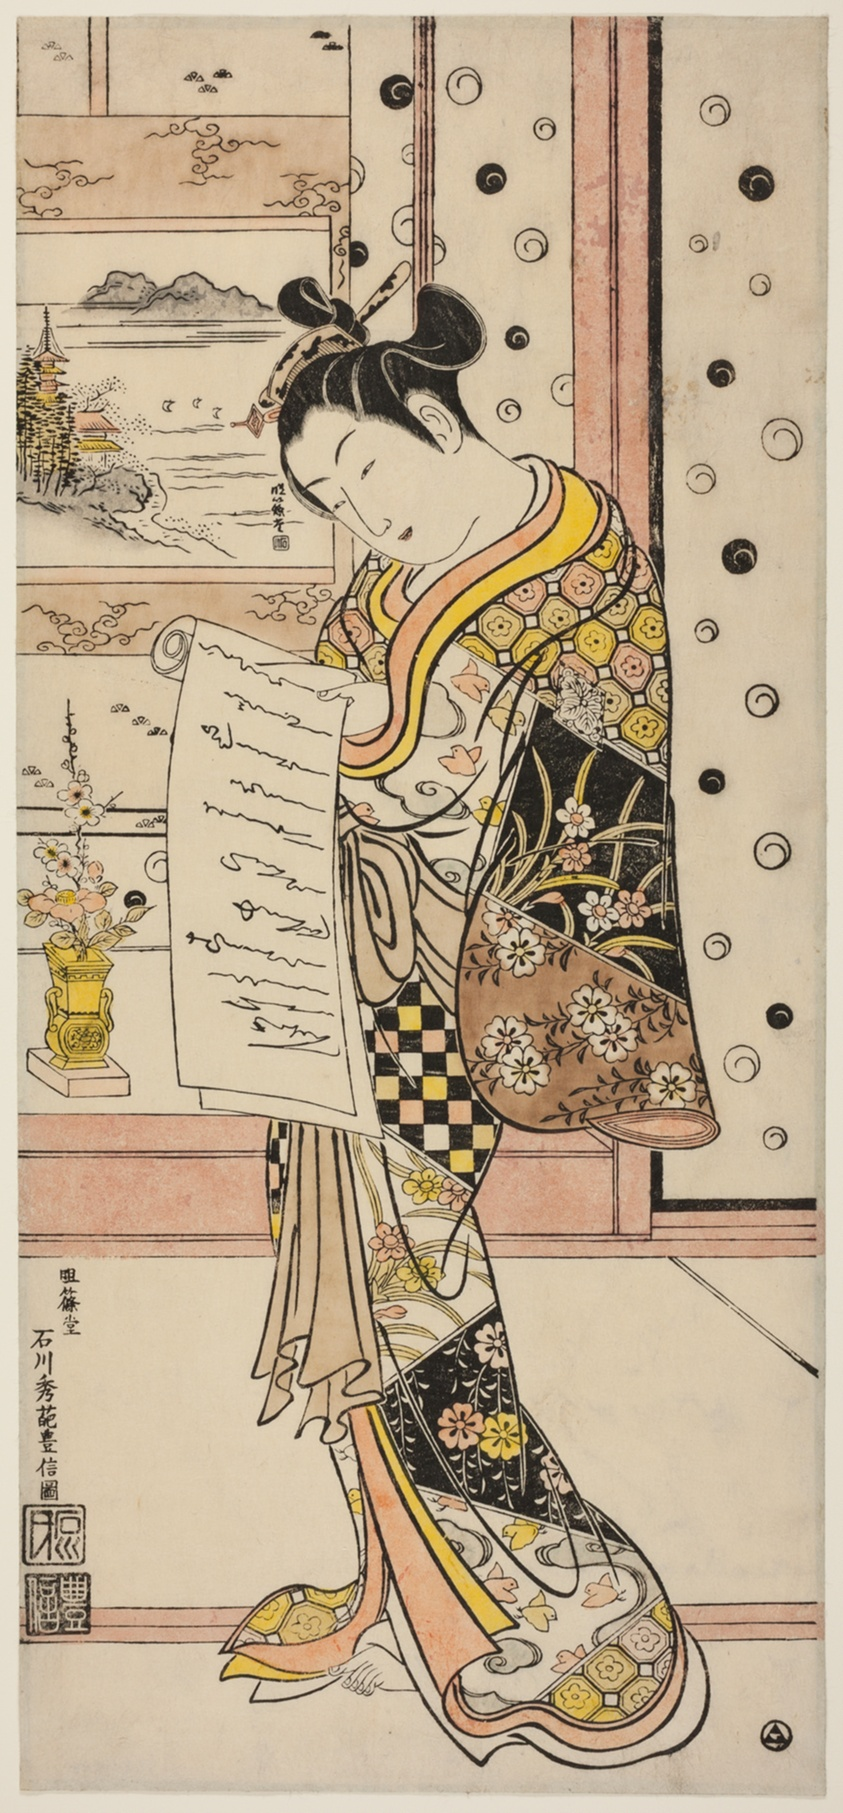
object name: Print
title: Courtesan Reading a Letter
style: Japanese (culture or style)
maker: Ishikawa Toyonobu (Japanese, 1711-1785)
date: c. 1745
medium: Hand-colored woodblock print; toku-oban, urushi-e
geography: Japan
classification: woodblock print; print; asian art